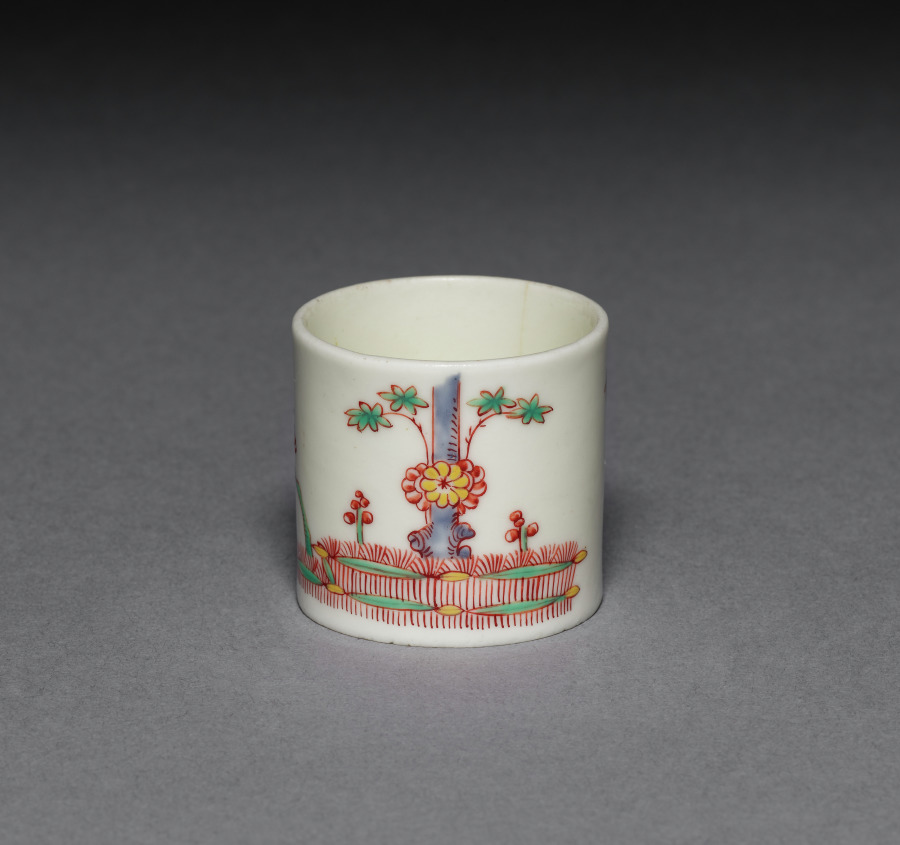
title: Pomade Pot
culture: France, 18th century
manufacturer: Saint Cloud Porcelain Factory (French)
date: c. 1730–40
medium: soft-paste porcelain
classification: Ceramic